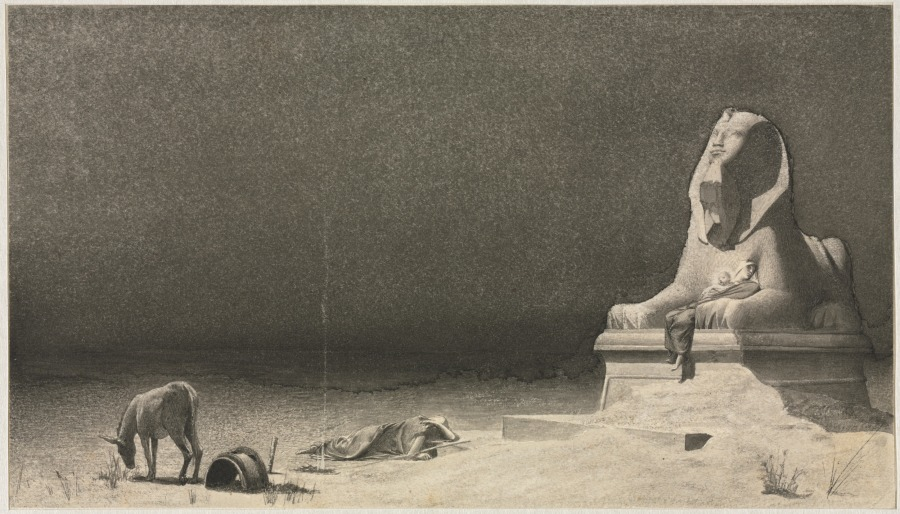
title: The Rest on the Flight into Egypt (recto); Sketch of a Sphinx [?] (verso)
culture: France, 19th century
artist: Luc-Olivier Merson (French, 1846–1920)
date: c. 1879–80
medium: gray and graphite wash, with scraping and traces of black chalk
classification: Drawing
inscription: verso: upper right, in graphite: [8?].86 x [8?].[7?]1 [sideways]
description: This drawing relates to Luc-Olivier Merson's Rest on the Flight into Egypt, among the most popular paintings exhibited at the 1879 Paris Salon. This dreamlike, highly unusual image from the familiar bible story shows Mary and Christ resting peacefully in the arms of a Sphinx, while Joseph sleeps near their dwindling fire. In the wake of its extraordinary success, Merson made several painted replicas of the work. Here, the composition is identical, but reversed, suggesting that it may have been an alternative version of the canvas.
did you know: It is possible that this drawing served as a model for a print, but the best-known printed reproduction of the painting differs from the sheet in several minor details.